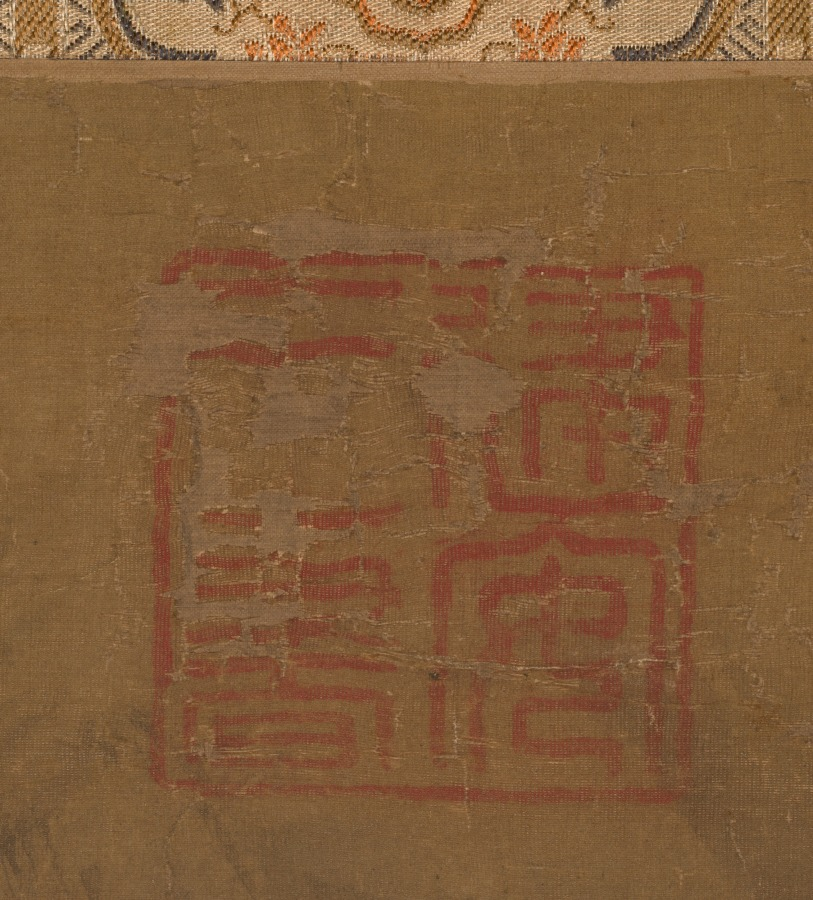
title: Eagles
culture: China, Ming dynasty (1368–1644)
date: 1368–1644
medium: Ink and color on silk panel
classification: Painting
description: Two eagles, painted in fine brushwork, perch on top of rocks surrounded by water, flowering camellia, and other vegetation, brushed in sweeping and broad strokes. Among birds, a favorite subject in Chinese painting, depictions of eagles can be traced back to at least the fourth century. Due to dramatic sociopolitical changes during the foreign-ruled Yuan (1279–1368) and native Ming dynasties, an elaborate symbolic language of the eagle developed. It can represent a vicious attacker, a courageous hero, or an enlightened emperor. In this painting, the two eagles are depicted peacefully resting in a lofty position, perhaps an idealistic image for a wise emperor and empress.